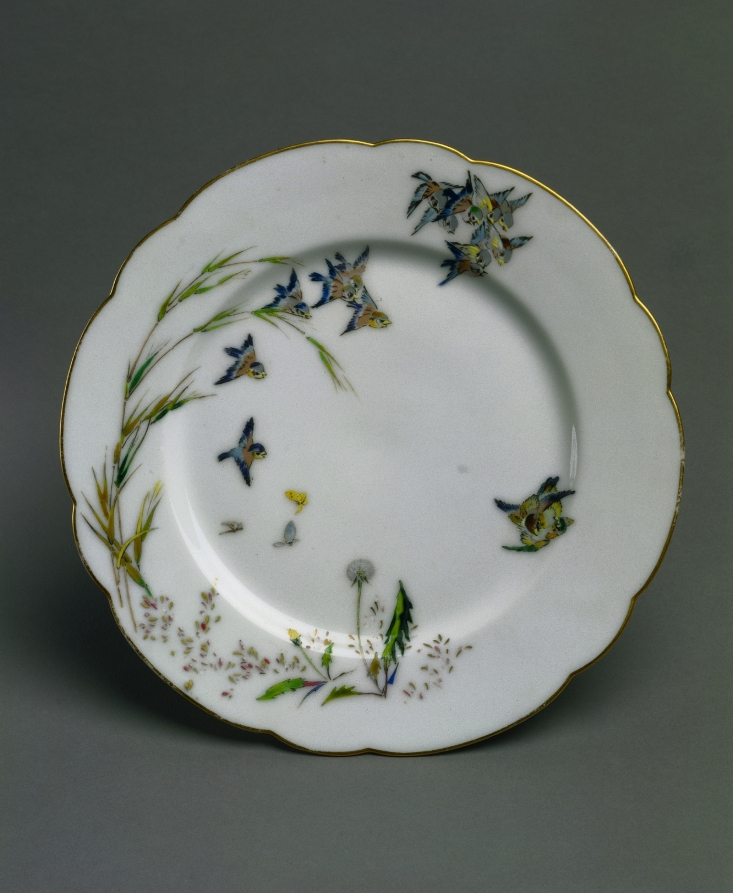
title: Plate: Combat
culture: France, 19th century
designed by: Félix Bracquemond (French, 1833–1914)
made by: Haviland & Co. (French)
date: c. 1876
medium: porcelain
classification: Ceramic